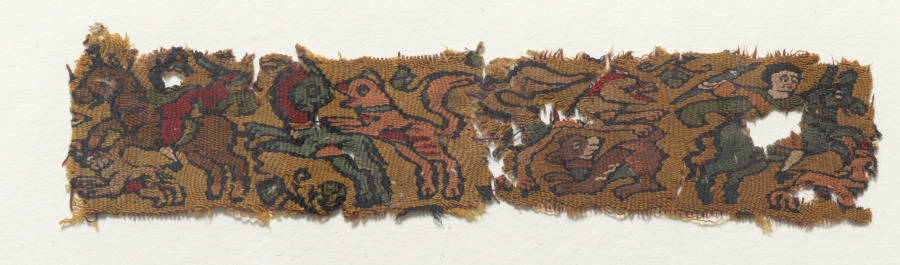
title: Three Fragments from a Border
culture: Egypt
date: before 1968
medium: Wool and linen: tapestry weave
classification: Textile